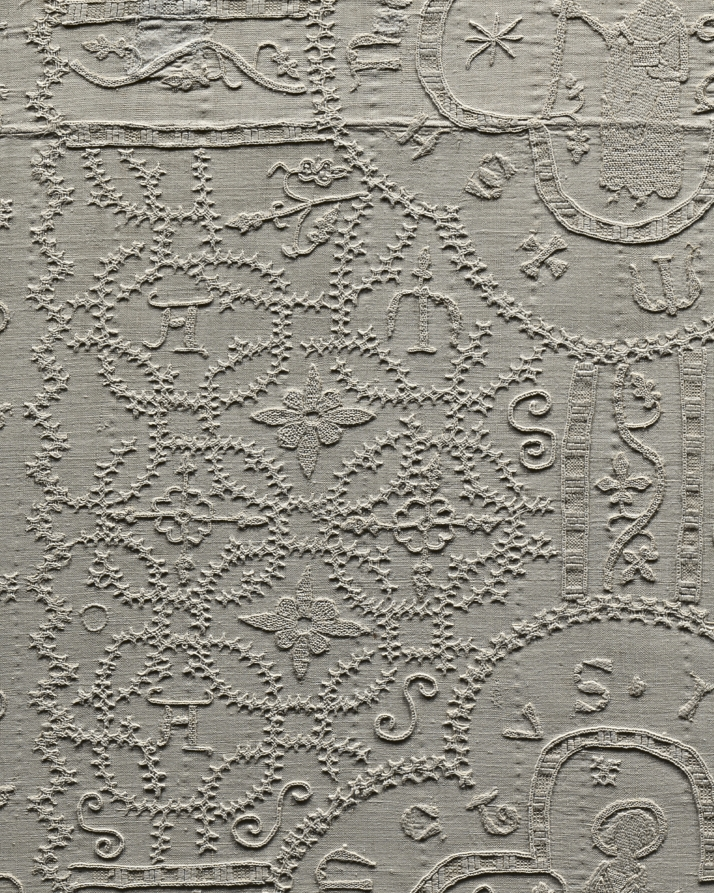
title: Altar Cloth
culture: Germany, Altenberg on the Lahn, Premonstratensian Convent, 14th century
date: c. 1350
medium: embroidery: linen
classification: Embroidery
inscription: various motifs enclosed in quatrefoils with identifying inscriptions in Gothic letters.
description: This large, embroidered altar cloth is one of the rarest, most important medieval church furnishings in existence. It was stitched by nuns in the Premonstratensian Convent in Altenberg on the Lahn River, north of Frankfurt, Germany, and was used to cover the church’s high altar in the weeks leading up to Easter. The cloth is an example of linen embroidery, a specialty of German nuns in the later Middle Ages. The Altenberg monastery church once had valuable furnishings; the high altar retable (a decorated frame with sculptures and paintings on the top of an altar) has survived, the main parts of which are now in the Städel Museum in Frankfurt, Germany.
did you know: When lit from behind, the previously hidden details emerge and the complex design becomes evident.